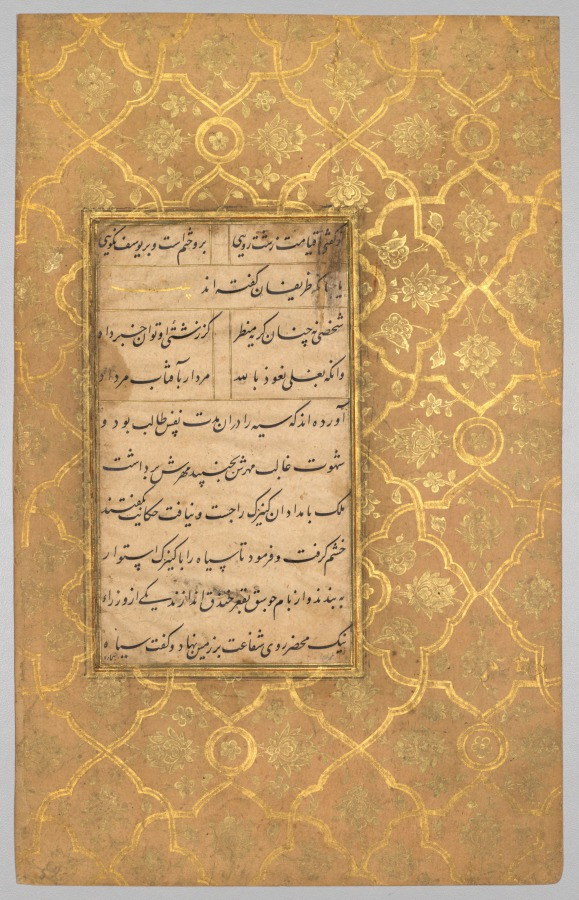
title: Illuminated folio (verso) from a Gulistan (Rose Garden) of Sa'di (c. 1213–1291)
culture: Iran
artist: Sultan 'Ali al-Mashadi (Iranian, 1430–1520)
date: calligraphy: c. 1475–1500; border: c. 1550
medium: Gum tempera, ink, gold, and silver on paper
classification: Manuscript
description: The border scene is set in a magical forest bursting with blossoms. At the top, a winged lion chases a winged deer, who is caught in the bottom border. The imagery of a lion biting down on its prey dates from the Achaemenid period in Iran (550–330 BCE) and references the valor of the king. A fox scurries off to the right. The verse is written in the Persian language using nastaliq script. Sultan ‘Ali Mashadi was widely renowned for perfecting the nastaliq script, and his calligraphy was a model for many followers across the Islamic world.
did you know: Meaning “rose bush” in Persian, the Gulistan is a collection of anecdotes in both verse and prose.